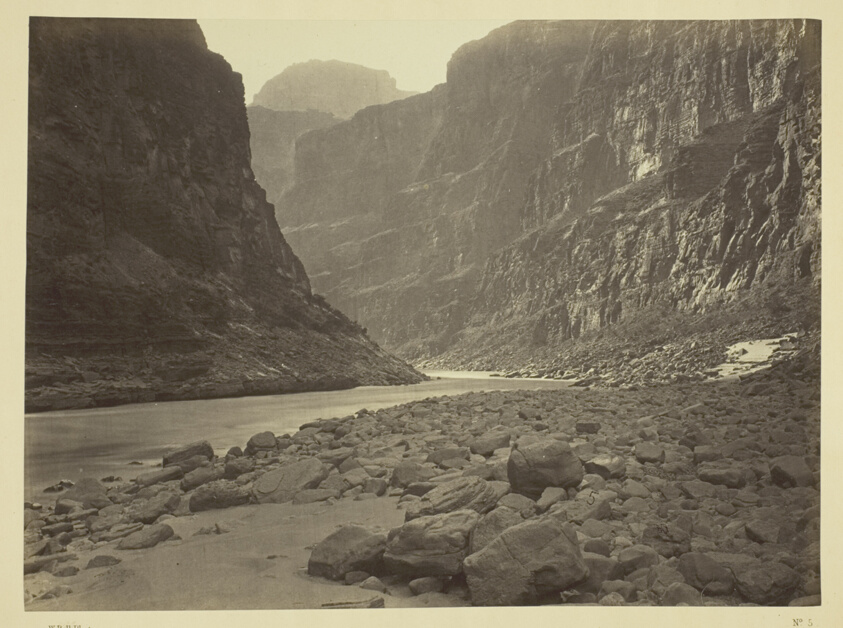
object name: Photograph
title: Colorado River, Mouth of Kanab Wash, Looking West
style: 19th century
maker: William H. Bell (American, 1830–1910)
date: 1872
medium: Albumen print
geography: United States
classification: albumen print from collodion negative; photograph; photography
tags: Collected by Hugh Edwards